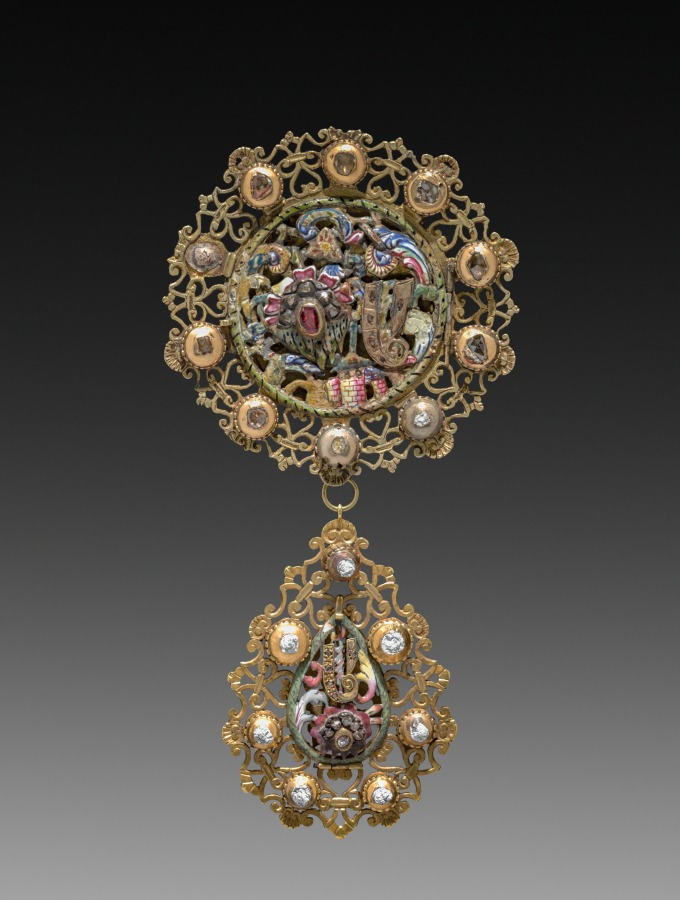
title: Pendant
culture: Belgium, 18th century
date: 1700s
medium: silver gilt and enamel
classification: Metalwork